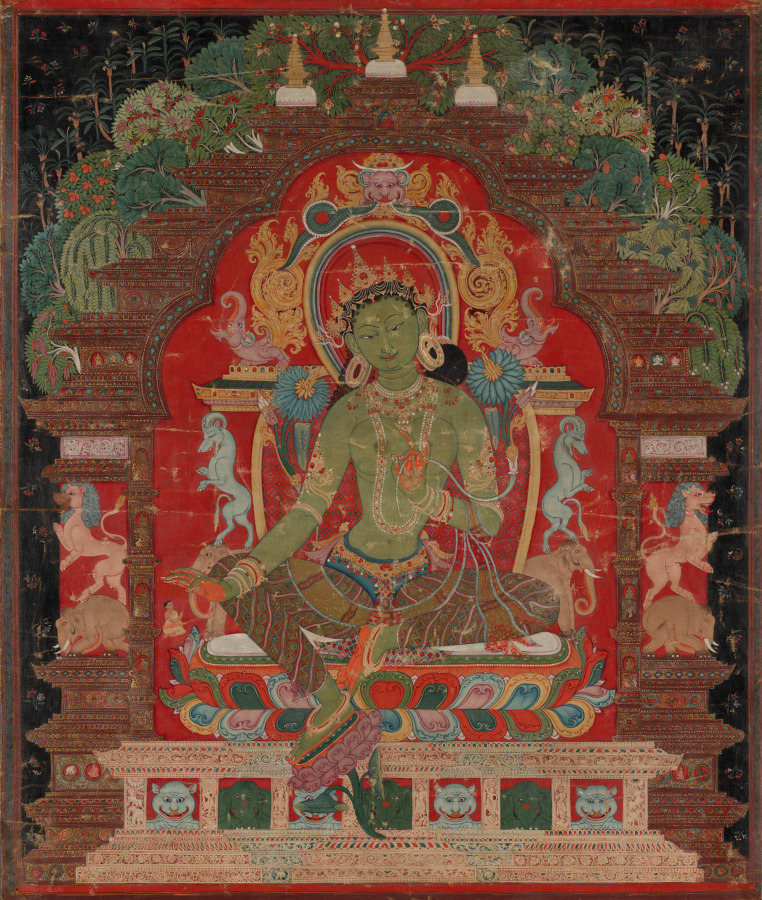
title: Green Tara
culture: Central Tibet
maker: attributed to Aniko (Nepalese, active in Tibet mid- to late 1200s)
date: c. 1260s; mounted, 2020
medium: thangka; gum tempera, ink, and gold on sized cotton; mount: silk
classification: Painting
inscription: Om Ah Hum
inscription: om tare tutare ture svaha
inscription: Om Ah Hum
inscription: Om Ah Hum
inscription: om ah sarva vyida svaha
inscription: ye dharmā hetuprabhavā he- tuṃ teṣāṃ tathāgato hy avadat teṣāṃ ca yo nirodha evaṃvādī mahāśramaṇaḥ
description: For Tibetans, Green Tara is one of the preeminent figures of their Buddhist faith, a radiant savioress who embodies the female form of the perfect, enlightened mind. The Green Tara in the Cleveland thangka—a Tibetan devotional painting on cloth—specifically dispels fear and provides protection, just like her mantra inscribed on the back side of the painting. Her green color and fear-not gesture link her to the cosmic Buddha of the North, enshrined above her head. Most scholars agree that this work was painted by the celebrated Nepalese artist known as Aniko.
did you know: The tiny monastic figure under Green Tara's right hand commissioned the painting.